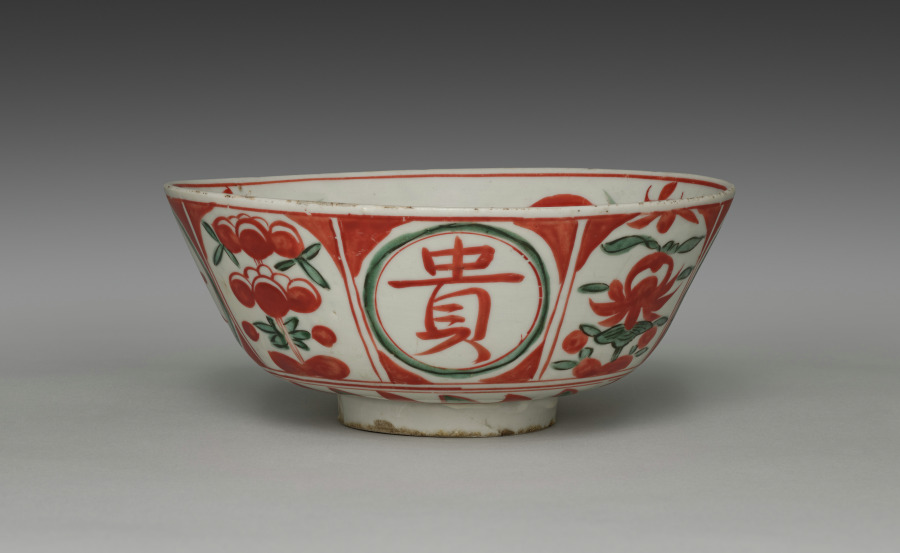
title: Bowl with Auspicious Ideographs and Floral Motifs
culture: China, Ming dynasty (1368–1644)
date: 1600s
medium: Stoneware with overglaze color enamels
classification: Ceramic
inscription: 長,命,富,貴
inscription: 【印】清風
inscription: 【印】大日本清風造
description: As part of their work, members of the Seifu studio, and Seifū Yohei III (三代清風与平, Japanese, 1851–1914), in particular, engaged in the viewing and appreciation of Chinese ceramics. While they were not authenticators, they would have been familiar with imported examples of Chinese stoneware and porcelain through tea gatherings, meetings with their elite clients, exhibitions, and other opportunities to see and study actual pieces from the mainland. This object and its box may be a reflection of Yohei III’s experiences of this kind. The bowl itself is slightly misshapen and roughly glazed with overglaze color enamels in red and green. Flanked by floral motifs, four Chinese characters brushed in red appear in roundels: 長命富貴. Meaning, respectively, longevity, life, prosperity, and status, they are pronounced together in Japanese as the phrase chōmeifūki, or “live long and prosper.” Additional loosely painted foliate designs in red and green circle the area above the foot and inside of the bowl. It is a relatively simple piece made by someone who was likely capable of much finer, more precise work but who could also do completely passable wares on short order. Of greater interest is the storage box lid for this piece. It has an inscription by Yohei III, with his seal, declaring it to be a “sweets dish from southern China with color images.” On the reverse of the lid, Yohei has written his name and placed his Imperial Household Artist seal, but instead of writing “made by,” he wrote “saw this [ceramic].” To the left of this is another inscription in a different hand, stating that the piece is a work from southern China with red-painted designs, produced at the very end of the Ming dynasty. It is signed “Kushi Takushin 久志卓真," along with his seal. Kushi Takushin (1898–1973) was a Japanese musician and music critic, as well as an antiques researcher and authenticator. He was especially interested in Ming dynasty Chinese ceramics and wrote extensively on Chinese, Japanese, and Korean ceramics. Originally from Hokkaido, he was active in Kyoto and began collecting art at a young age. Both he and Yohei appreciated and commented upon the bowl, and perhaps they both owned it.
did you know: Each roundel contains an auspicious word conveying good wishes for a long life and wealth.